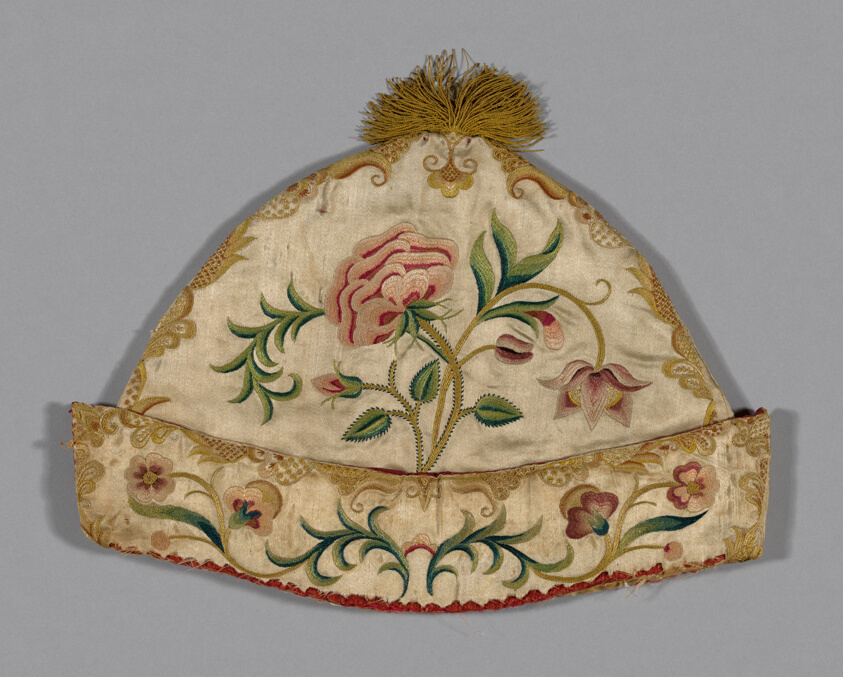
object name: Textile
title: Cap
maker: France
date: 1775/1800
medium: Silk, satin weave; embroidered with silk threads in stem, long and short, and satin stitches; French knots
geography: France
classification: textile; costume accessory - headdress; needlework (visual works); costume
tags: fashion